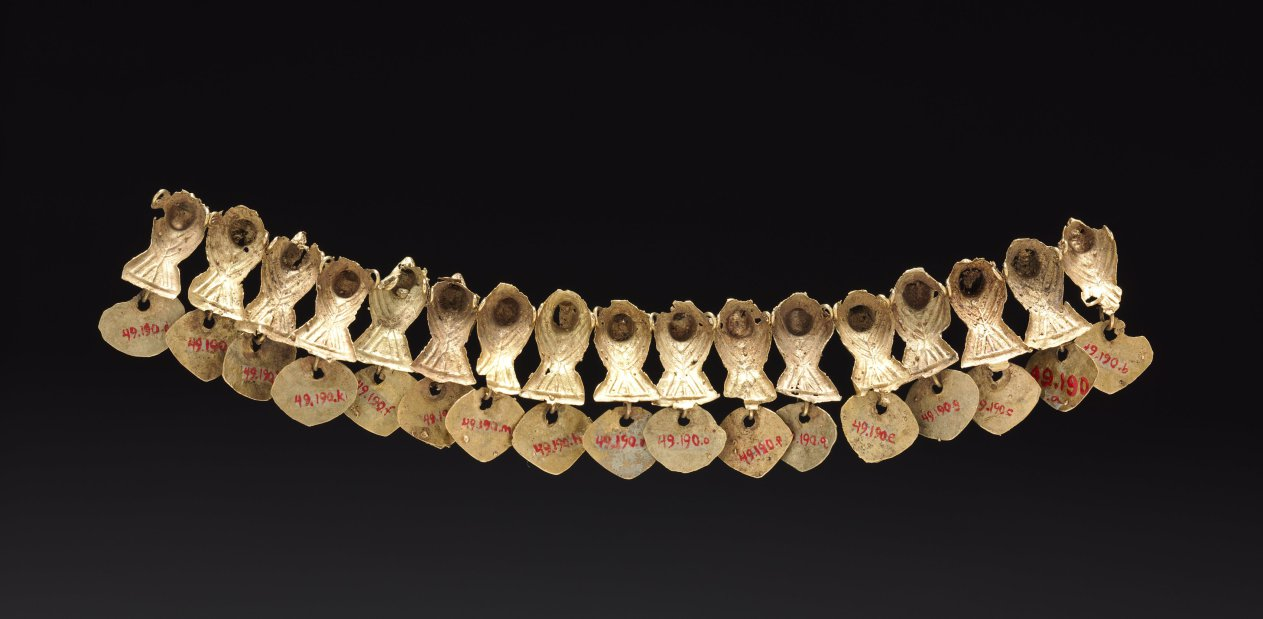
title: Bird Beads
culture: Colombia, Muisca style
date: c. 900–1550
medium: cast gold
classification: Jewelry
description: Muisca metalwork divides into two categories: ornaments to be worn, such as these, and offering figurines, in the case to the right. The elaborate bird pendant features delicate herringbone moldings, openwork patterns, and wing details-all part of the wax model from which the pendant was cast (see nearby computer animation). The dangles were attached after casting.